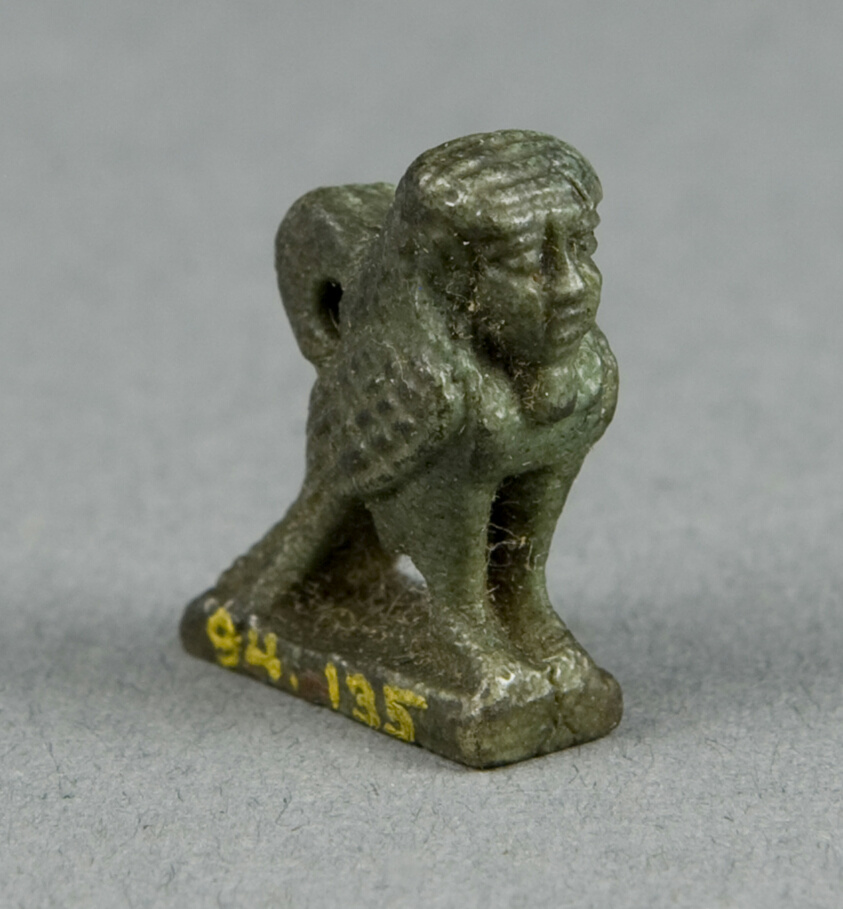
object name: Costume and Accessories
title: Amulet of a Human-headed Ba Bird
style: egyptian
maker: Egyptian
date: Third Intermediate Period–Ptolemaic Period (about 11th century–1st century BCE)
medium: Faience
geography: Egypt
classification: amulet; jewelry; ceramics; ancient art; costume; faïence (composite material)